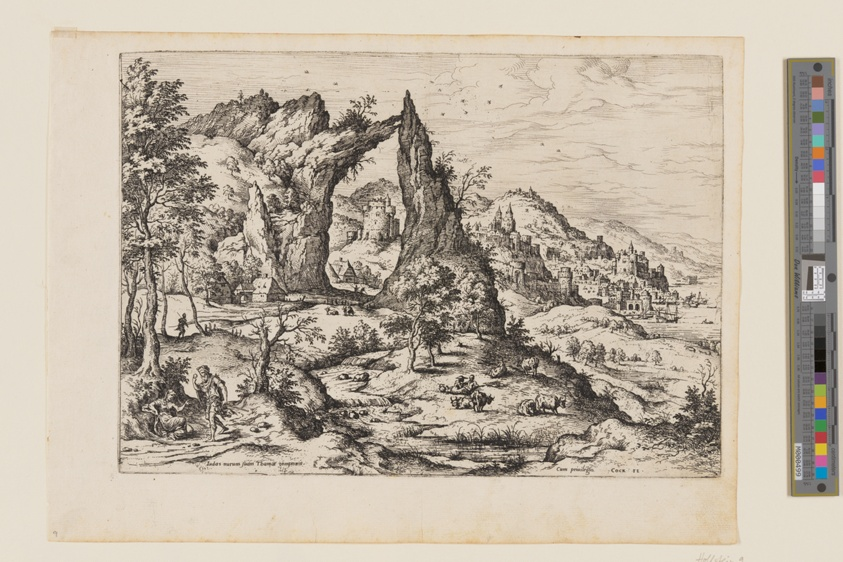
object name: Print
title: Juda and Tamar, from Landscapes with Biblical and Mythological Scenes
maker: Hieronymus Cock (Netherlandish, c. 1510–1570); after Matthys Cock (Netherlandish, c. 1505-1548)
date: 1558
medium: Etching on ivory laid paper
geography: Netherlands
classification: etching; paper; print; prints and drawing